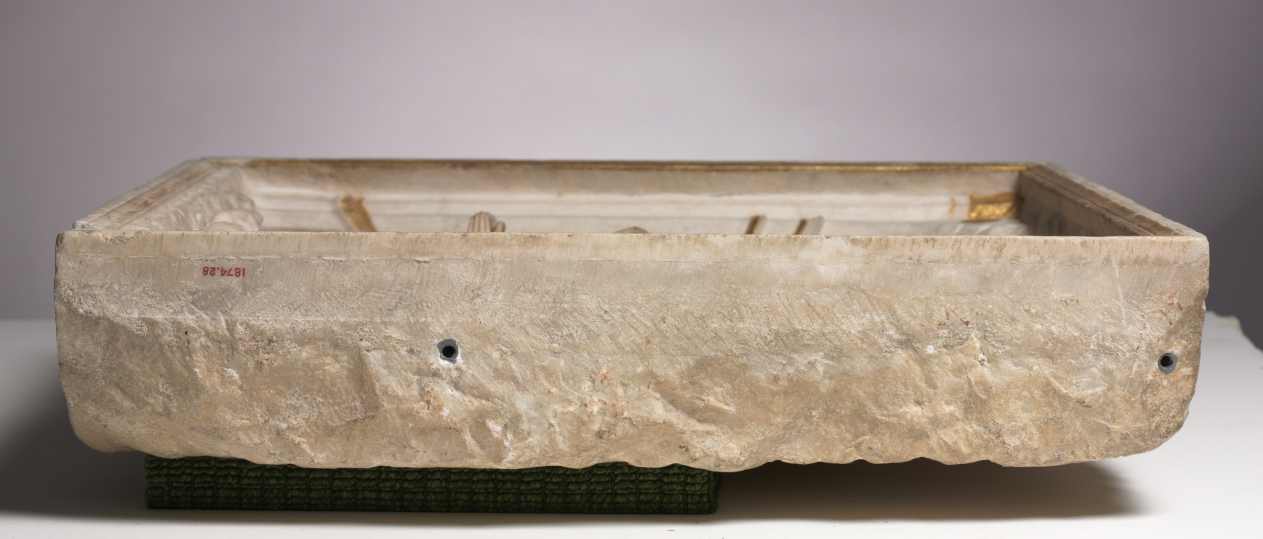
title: Pier Francesco Visconti, Court of Saliceto, Adoring the Christ Child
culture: Italy, Milan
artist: workshop of Benedetto Briosco (Italian, c. 1460–after 1514)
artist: and Tomaso Cazzaniga (Italian)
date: shortly after 1484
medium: marble with gilding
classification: Sculpture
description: This relief formed part of a public funerary monument in the church of Santa Maria del Carmine in Milan. The military leader and diplomat humbly kneels in profile before the infant Christ in a naturalistic setting, drawing attention to the Holy Family’s humanity and the deceased man’s reverence.